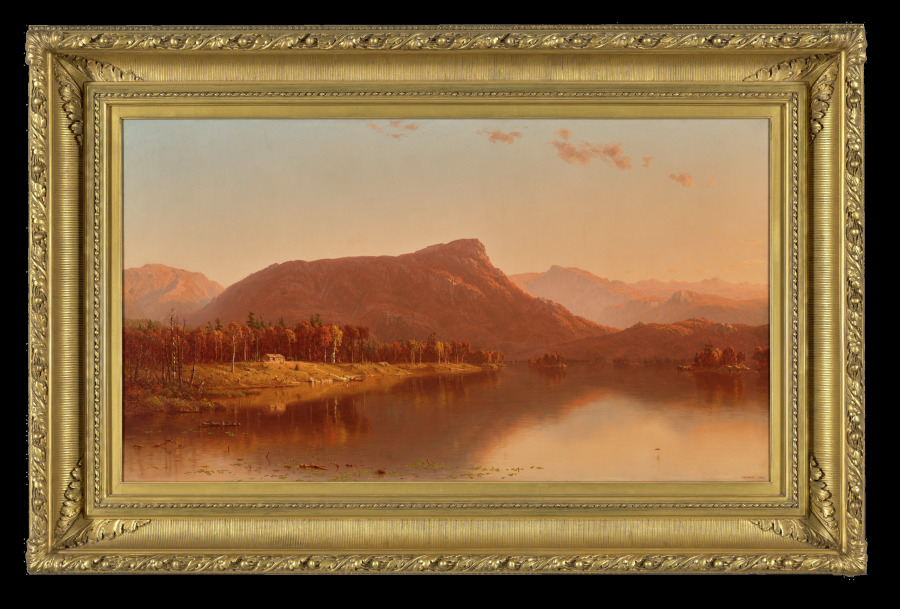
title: A Home in the Wilderness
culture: America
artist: Sanford Robinson Gifford (American, 1823–1880)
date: 1866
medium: oil on canvas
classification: Painting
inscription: Signed lower right: SR Gifford. 1866.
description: Gifford’s view of Mount Hayes in New Hampshire records human intrusion into a remote landscape. On the left riverbank a log cabin stands amid a recently cleared patch of land with several tree stumps, while figures in its doorway greet a man who has arrived with a canoe of supplies.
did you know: Gifford considered this painting to be one of his finest creations.